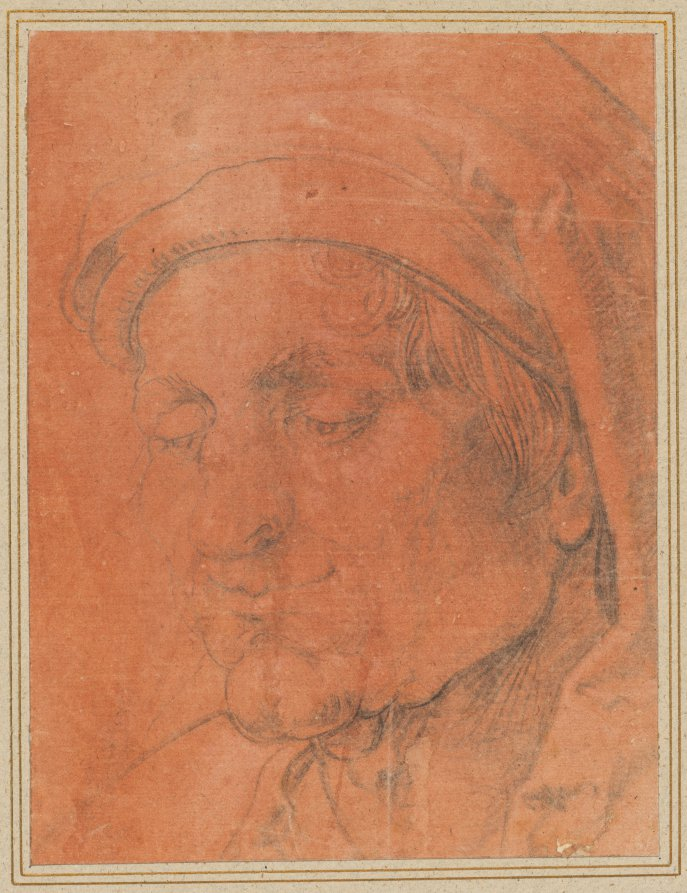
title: Head of a Man in a Cap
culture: Germany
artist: Anonymous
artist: school of Albrecht Dürer (German, 1471–1528)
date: 16th century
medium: black and brown chalk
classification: Drawing